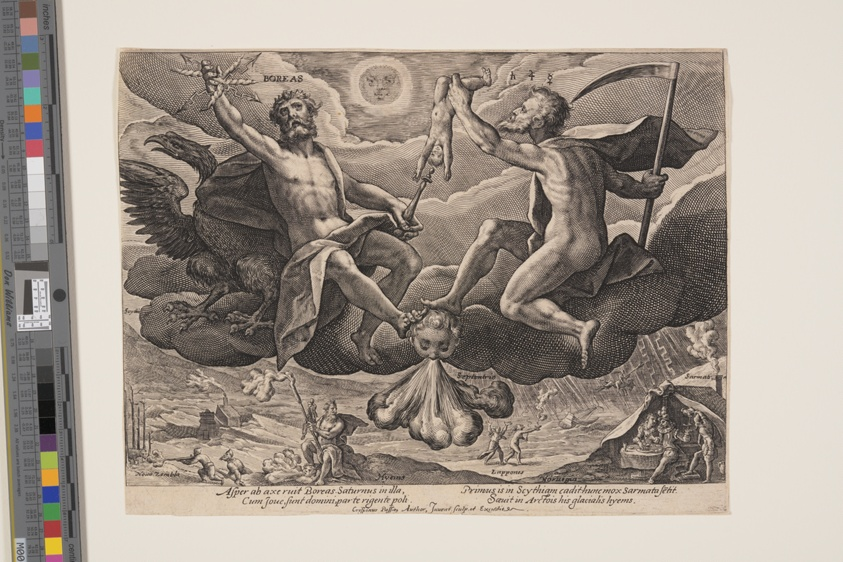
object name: Print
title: Boreas, from The Winds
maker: Crispijn van de Passe I; (Dutch, c. 1565–1637)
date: c. 1603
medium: Engraving on ivory laid paper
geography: Netherlands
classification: engraving; paper; print; prints and drawing